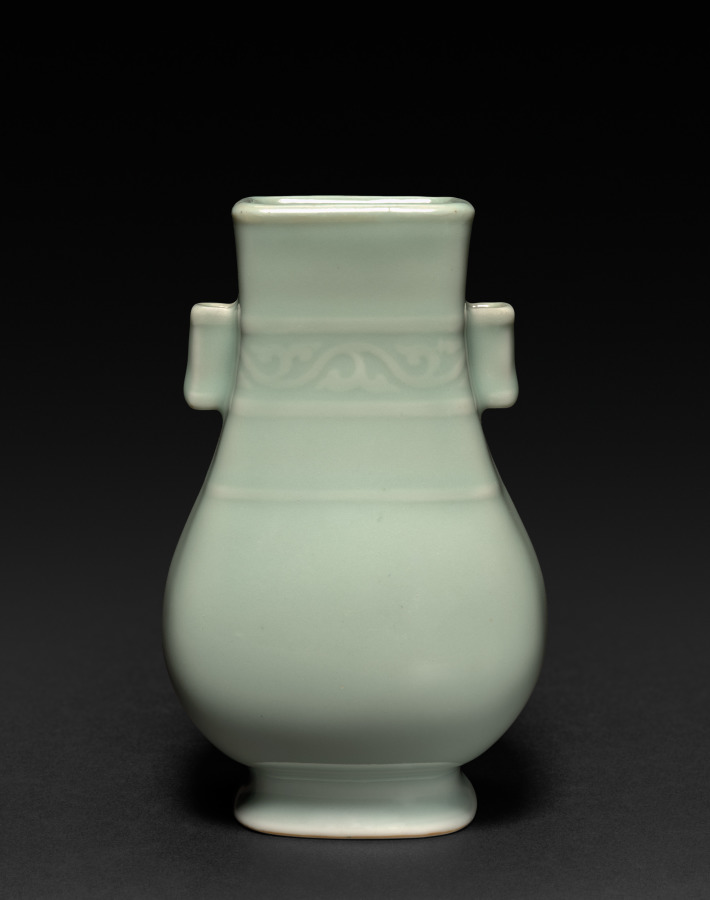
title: Vase in Form of Archaic Hu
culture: China, Jiangxi province, Jingdezhen kilns, Qing dynasty (1644-1911), Qianlong mark and reign (1736-95)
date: 1736–95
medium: porcelain with celadon glaze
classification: Ceramic